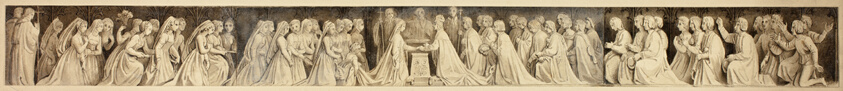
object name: Drawing and Watercolor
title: Marriage of Henry VII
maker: Possibly Thomas Stothard; English, 1755-1834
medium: Pen and brown ink and brush and brown wash on cream wove paper, pieced together and laid down on board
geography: England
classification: pen and ink drawings; paper; brush and wash; drawings (visual works); prints and drawing